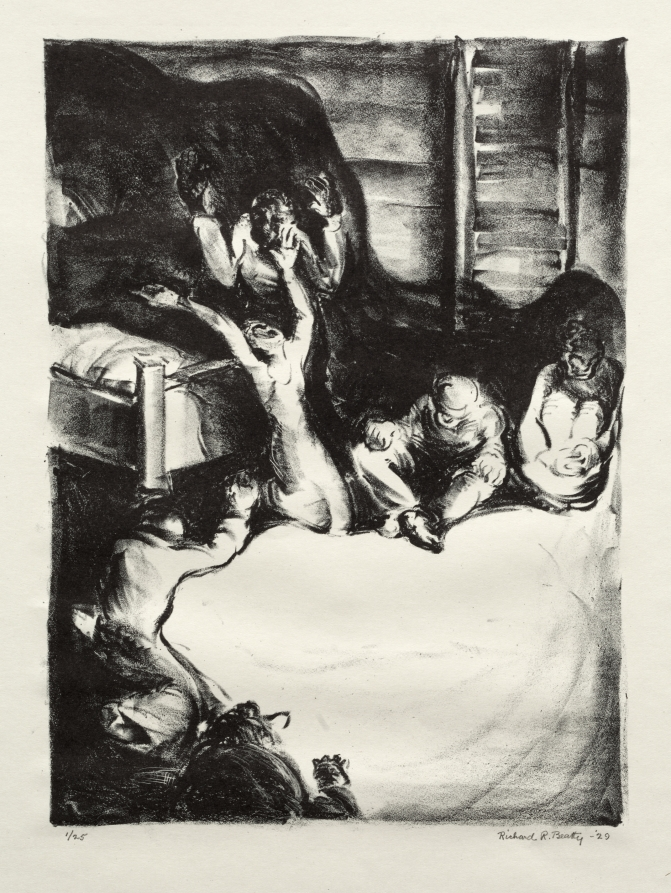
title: Porgy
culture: America, Ohio, Cleveland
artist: Richard Beatty (American, 1899–1961)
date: 1929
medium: lithograph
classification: Print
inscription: inscribed, lower left margin, in graphite: 1/25; lower right margin, in graphite: Richard R. Beatty - '29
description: For his skill in lithographs such as this, Richard Beatty was hired as an instructor when Karamu formed a graphic arts program around 1933. While teaching himself lithography at night, Beatty portrayed theater and cabaret scenes using dense, expressive lines from a waxy crayon. He described Porgy (1927) as his favorite print and was inspired after seeing a play by the same name at the Ohio Theatre. Elongated and slumping figures convey the narrative’s emotional climax, about a man’s attempts to rescue his love from her violent partner. The performance featured an entirely Black cast—unusual for the time—and opened to great acclaim in Cleveland in 1929.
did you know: After opening on Broadway to popular acclaim in 1927, Porgy toured the United States and Europe for the next two years.